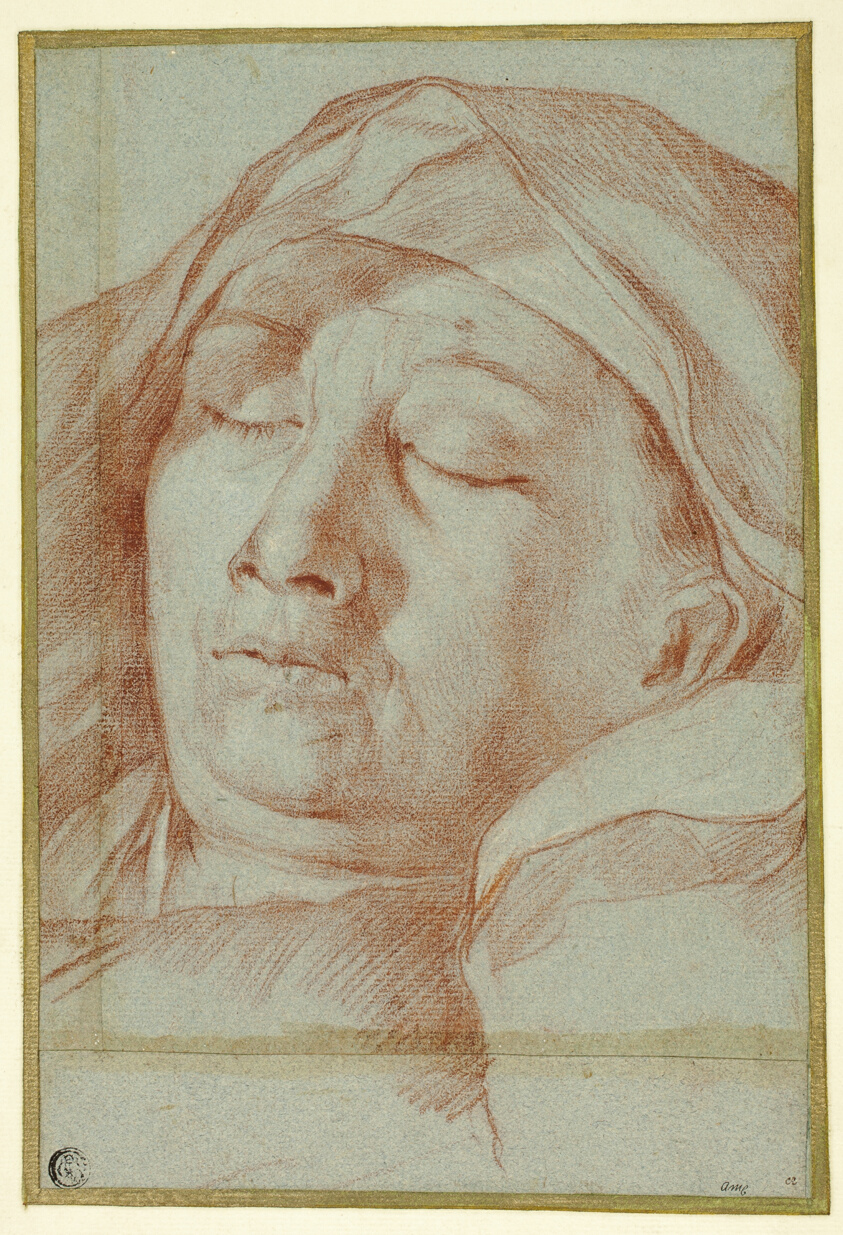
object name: Drawing and Watercolor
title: Head of a Sleeping Man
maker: Attributed to Giovanni Battista Salvi (Italian, 1609-1685); or Ottavio Mario Leoni (Italian, 1578-1630); or Carlo Maratti (Italian, 1625-1713)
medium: Red chalk, heightened with touches of white chalk, on blue laid paper, pieced and laid down on ivory laid paper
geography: Italy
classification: chalk; drawings (visual works); prints and drawing